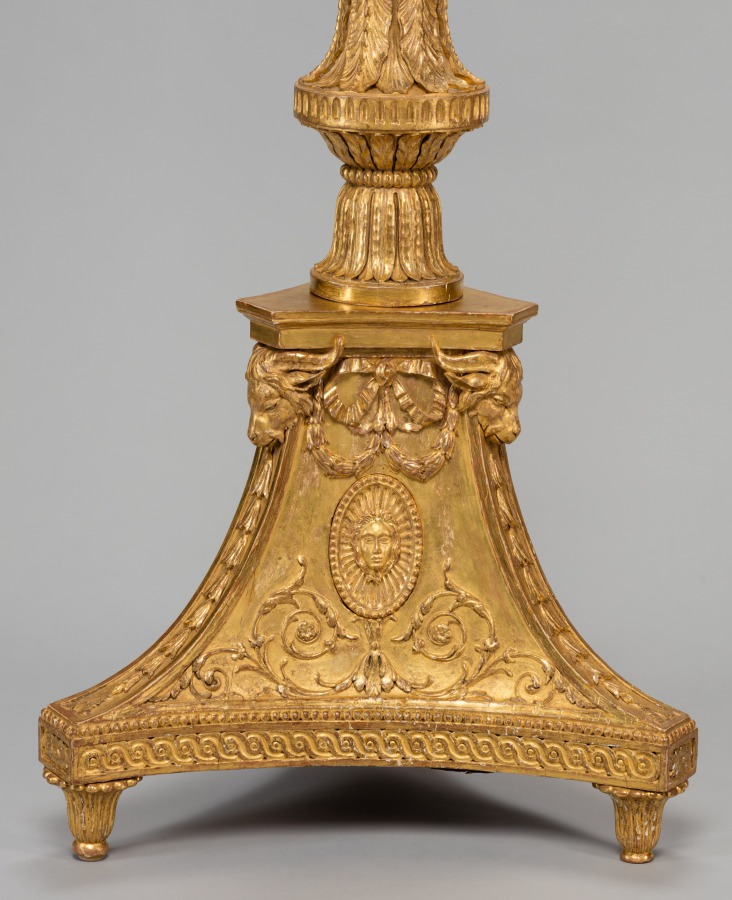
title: Candle Stand (torchère) (2 of 2)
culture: England, 18th century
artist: Thomas Chippendale (British, 1718–1779)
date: c. 1773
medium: Gilt-wood, gesso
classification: Furniture and woodwork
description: This gilded candle stand was made by Thomas Chippendale, the most renowned cabinetmaker in eighteenth-century London, for the grand drawing room of Brocket Hall, a large country house in Hertfordshire, England. With finely carved acanthus leaves, swags, fluting, and oval masks depicting the Roman goddess Diana, this candle stand exhibits Chippendale’s masterful understanding of neoclassical proportion, scale, and ornament. His landmark book of furniture designs, The Gentleman and Cabinet-Maker’s Director (first published in 1754), was highly admired as a source of inspiration by cabinetmakers and architects around England as well as in Europe and America.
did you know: Candle stands usually held silver or crystal candelabra that were lit for evening entertainment.